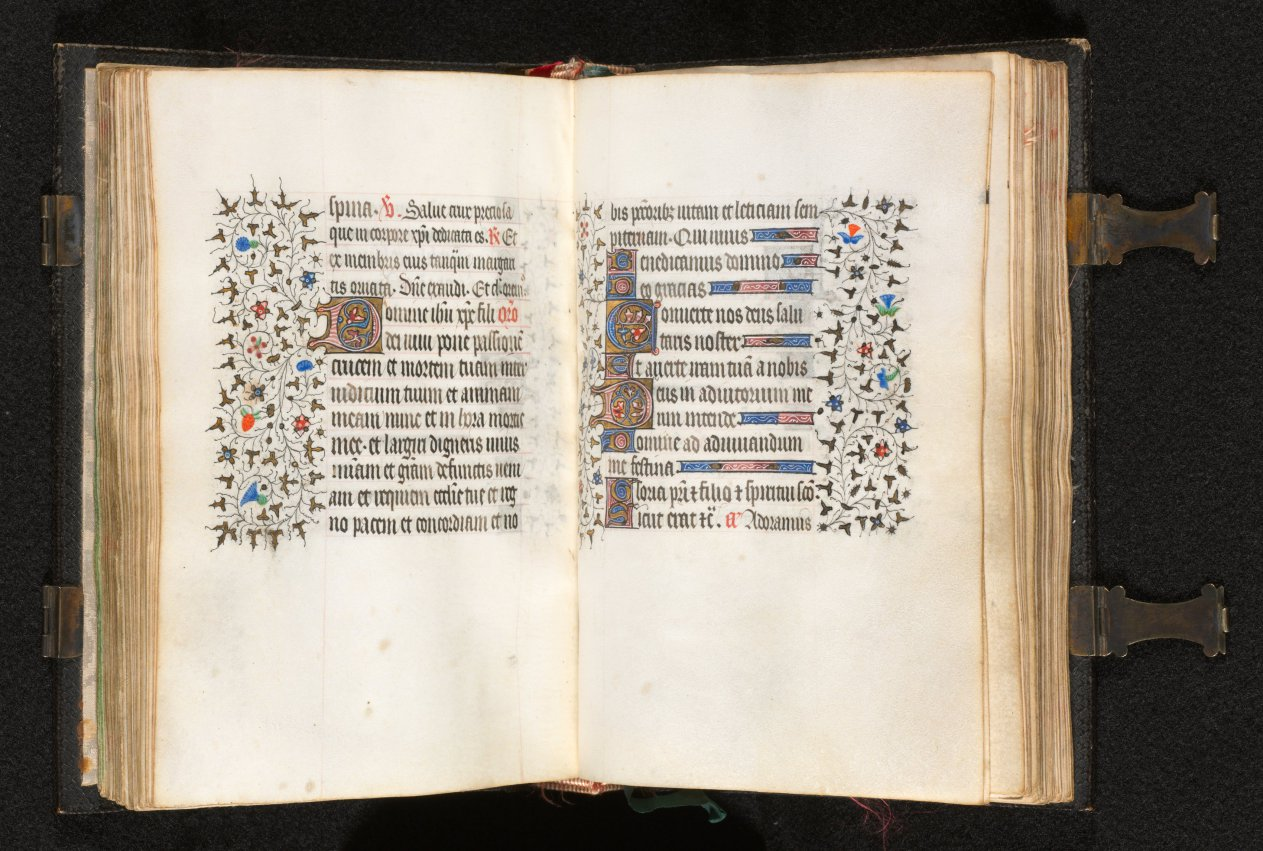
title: Book of Hours (Use of Paris): Fol. 105v, Initial D with Decorated Border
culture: France, Paris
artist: possibly studio or workshop of The Bedford Master (French, Paris, active c. 1405–30)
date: c. 1420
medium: ink, tempera, and gold on vellum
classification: Bound Volume